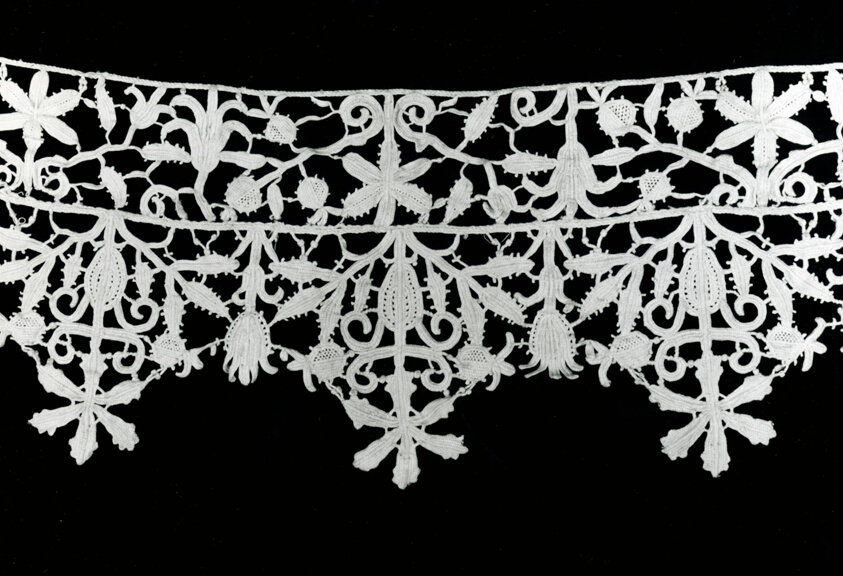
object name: Textile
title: Border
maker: Italy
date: c. 1620/30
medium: Linen, needle lace worked on a laid and plaited thread grid, Reticello pattern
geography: Italy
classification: textile; lace - needle